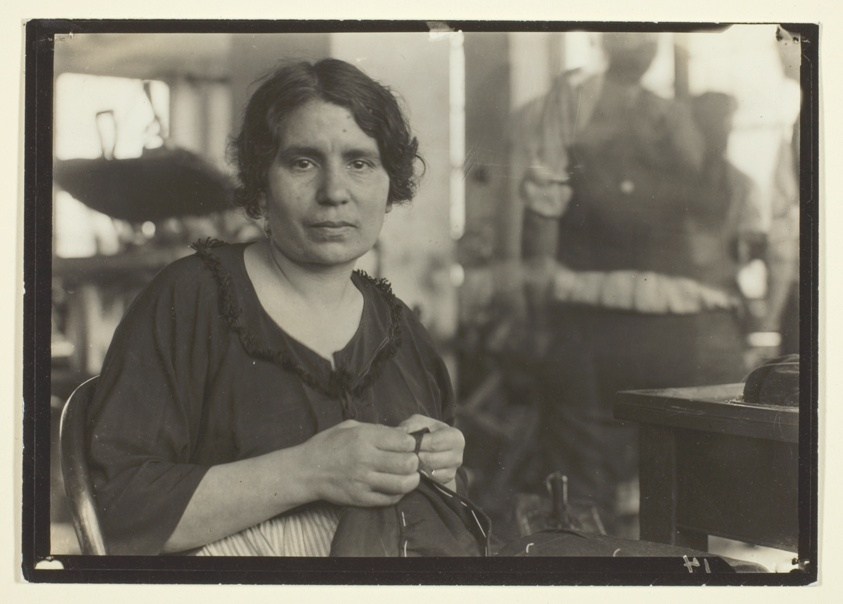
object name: Photograph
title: Woman Garment Worker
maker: Lewis Wickes Hine (American, 1874–1940)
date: c. 1915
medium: Gelatin silver print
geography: United States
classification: gelatin silver (developing-out-paper) pr; photographic process; photography; photograph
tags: Collected by Hugh Edwards, documentary